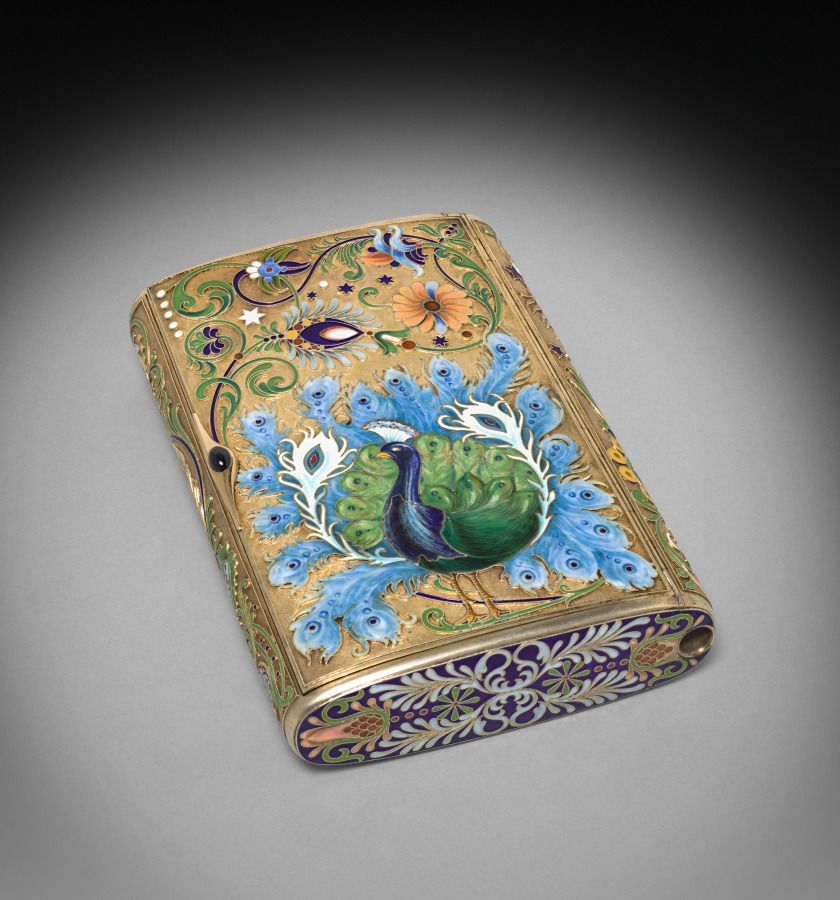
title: Cigar Box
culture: Russia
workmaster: attributed to Feodor Ivanovich Rückert (Russian, 1840–1917)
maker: House of Fabergé (Russian, 1842–1918)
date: c. 1896–1908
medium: Silver gilt, enamel, sapphire set in gold; [reproduction silk tinder cord, gold and moonstone catch]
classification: Silver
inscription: C. Fabergé (in Cyrillic); double-headed eagle [imperial warrant]; 84, Kokoshnik, tester's initials [assay mark for Moscow, 1896-1908]; scratched 16358.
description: Fabergé’s craftsmen in Moscow became known for their work in the pan-Slavic or neo-Russian taste, hearkening back to 17th-century styles of Russian folk decoration. In this whimsically oversized box for cigars or loose tobacco, Fabergé used the technique to highlight a symbol of imperial royalty, the preening peacock, here rendered in brilliant hues of blue and green enamels.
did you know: Peacocks were considered a symbol of imperial royalty in Russia.